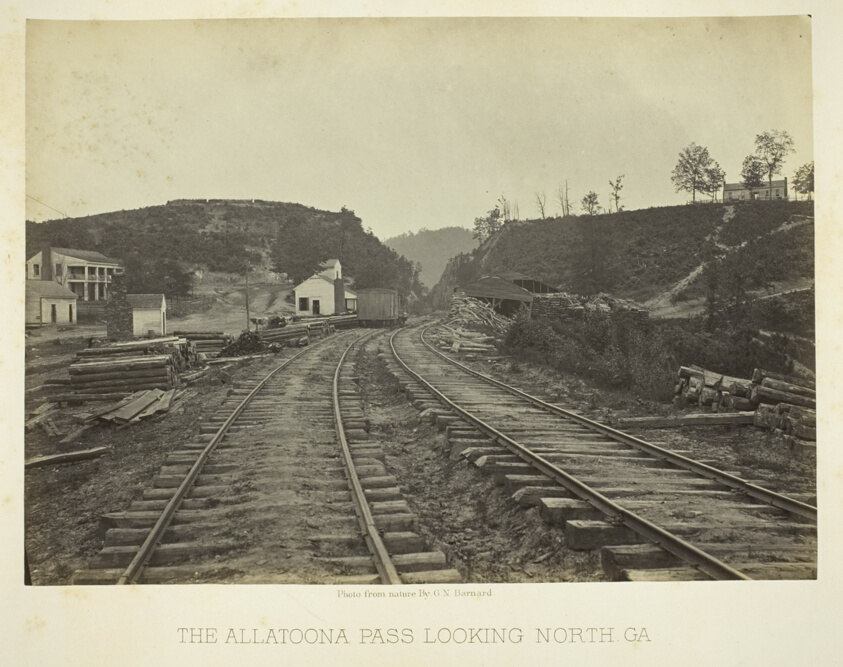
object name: Photograph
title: The Allatoona Pass, looking North, GA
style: 19th century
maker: George N. Barnard (American, 1819–1902)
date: 1866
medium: Albumen print, plate 28 from the album "Photographic Views of the Sherman Campaign" (1866)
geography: United States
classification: albumen silver print; photographic process; photography; photograph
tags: Collected by Hugh Edwards, Sherman's Campaign 1866